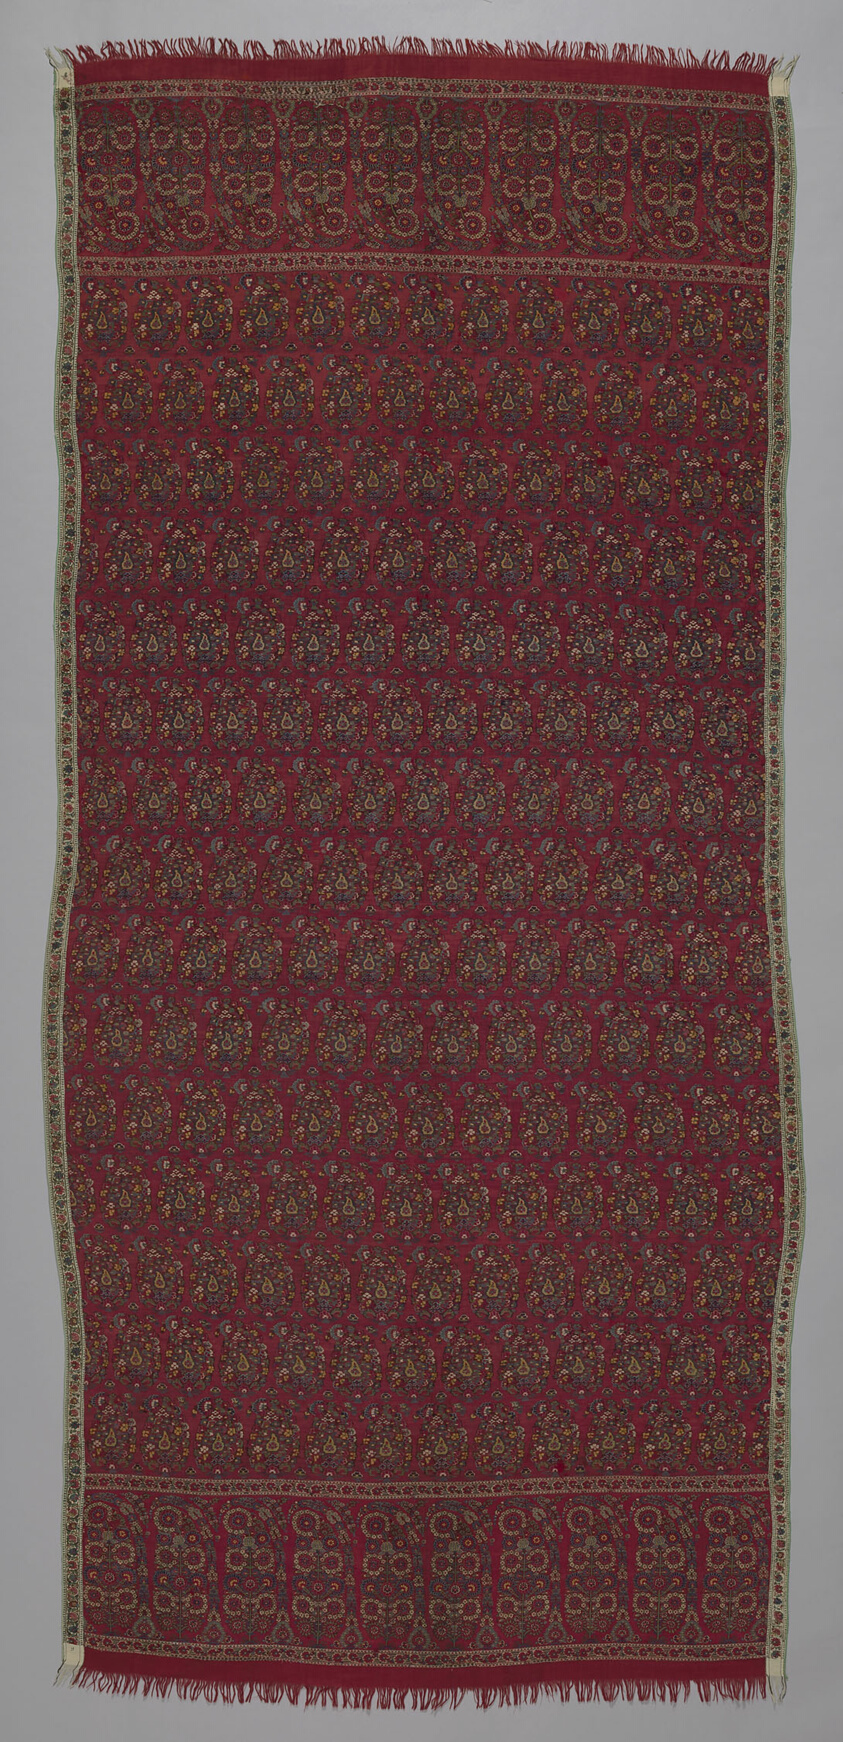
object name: Textile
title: Long Shawl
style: Islamic (culture or style)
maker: India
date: 1800/15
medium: Wool, double interlocking twill tapestry weave; attached side borders, ends and tabs of pieced twill weaves; main warp fringe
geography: India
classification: textile; weaving